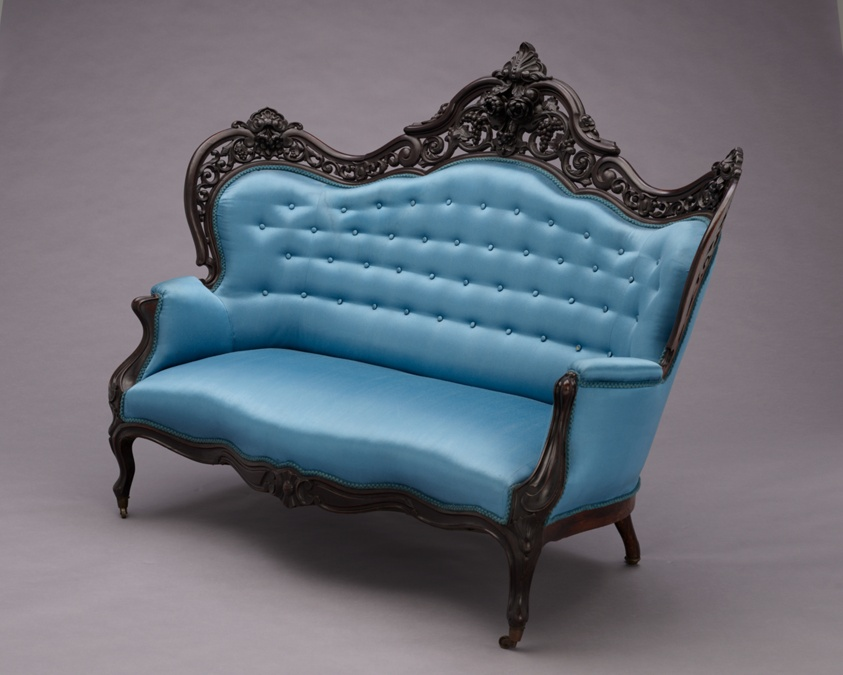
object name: Furniture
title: Sofa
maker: John and Joseph W. Meeks Company; American, active 1836–59; New York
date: 1856–65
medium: Rosewood and upholstery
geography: New York City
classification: seating; furniture; american decorative arts; american arts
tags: furniture